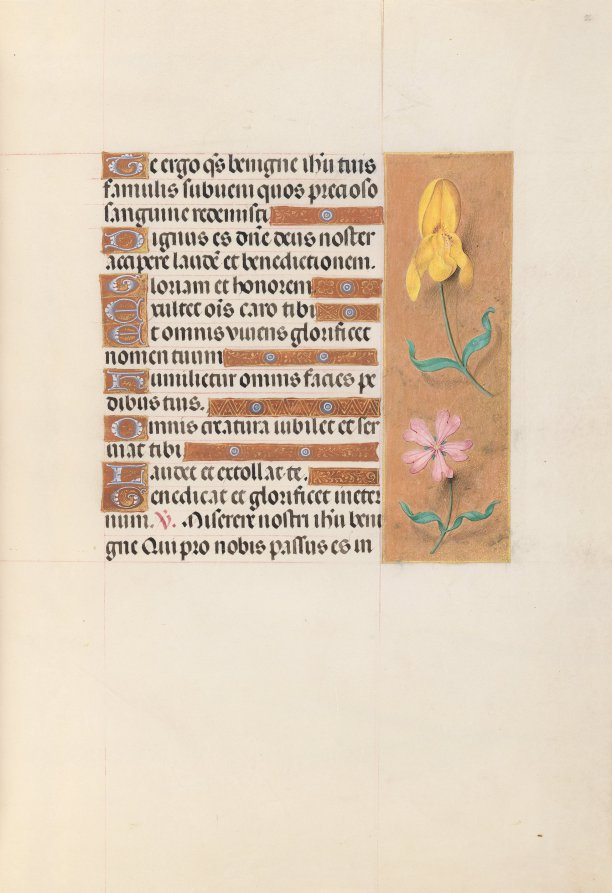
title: Hours of Queen Isabella the Catholic, Queen of Spain: Fol. 56r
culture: Flanders, Ghent and Bruges, late 15th century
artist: Master of the First Prayerbook of Maximillian (Flemish, c. 1444–1519)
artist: and Associates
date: c. 1500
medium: ink, tempera, and gold on vellum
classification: Bound Volume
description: This manuscript was illuminated by a circle of at least five highly organized manuscript painters active in the Flemish cities of Ghent and Bruges. The principal illuminator was Alexander Bening, who painted the majority of the book's miniatures. Manuscripts produced by this circle of artists are renowned for the decoration of their borders, which typically feature a rich variety of realistically-painted flowers, birds, and butterflies. This prayer book, called a book of hours, was intended not for a cleric, but for the private devotions of a lay person-in this case, Isabella the Catholic, Queen of Spain (1451-1504). Isabella's coat of arms embellishes the book's frontispiece. It is unlikely that the book was commissioned by the Queen herself; rather, she probably received it as a diplomatic gift from someone courting her patronage, perhaps Cardinal Francisco Jimenez de Cisneros. A Franciscan friar, Jimenez was dependent upon Isabella for his advancement, first to the post of Queen's confessor in 1492, and then to Archbishop of Toledo in 1495.